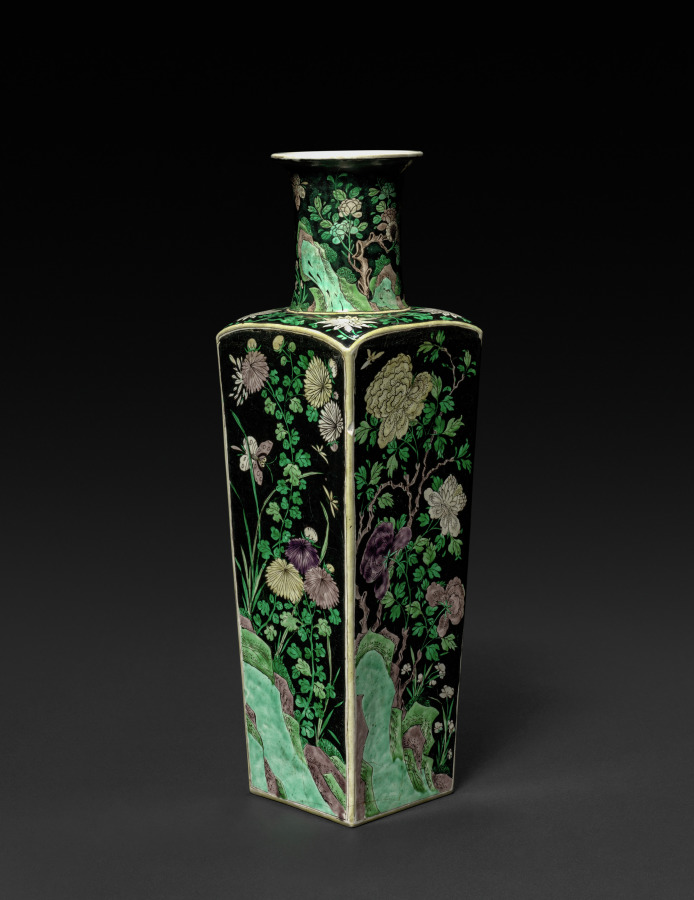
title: Club-shaped Vase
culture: China, Qing dynasty (1644-1911), Kangxi reign (1662-1722)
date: 1662–1722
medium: porcelain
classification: Ceramic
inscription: 大明成...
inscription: [arrow] FRONT/Stand #114